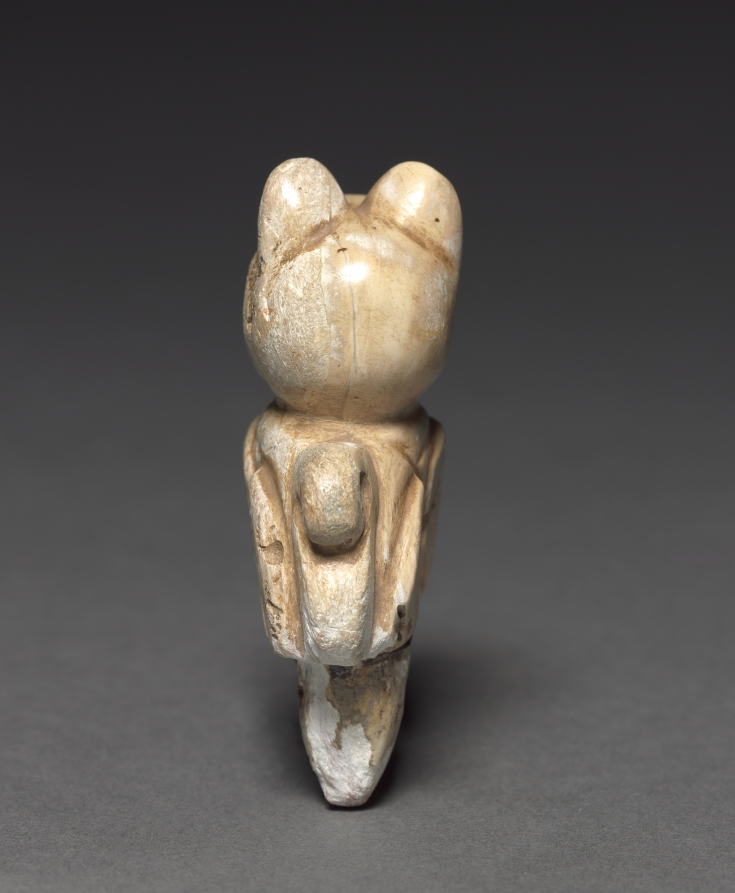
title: Crouching Feline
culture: Peru, Wari (?), 6th-10th Century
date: c. 500–900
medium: stone, turquoise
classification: Jewelry